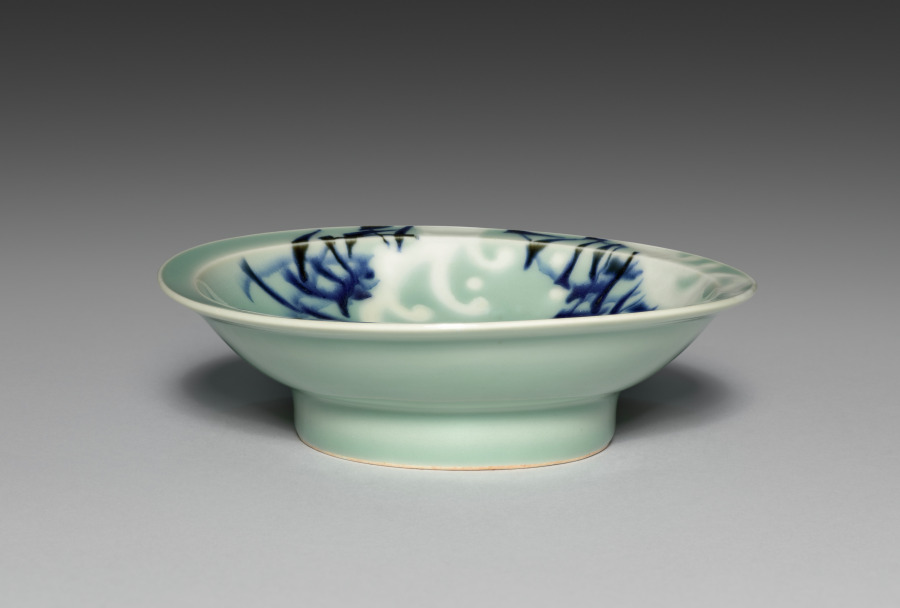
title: Small Dish (Kozara) with Waves and Reeds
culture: Japan, Edo period (1615–1868)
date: late 1600s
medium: Porcelain with underglaze blue and celadon (Hizen ware, Nabeshima type)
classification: Ceramic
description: This dish has a green glaze often called celadon in English.